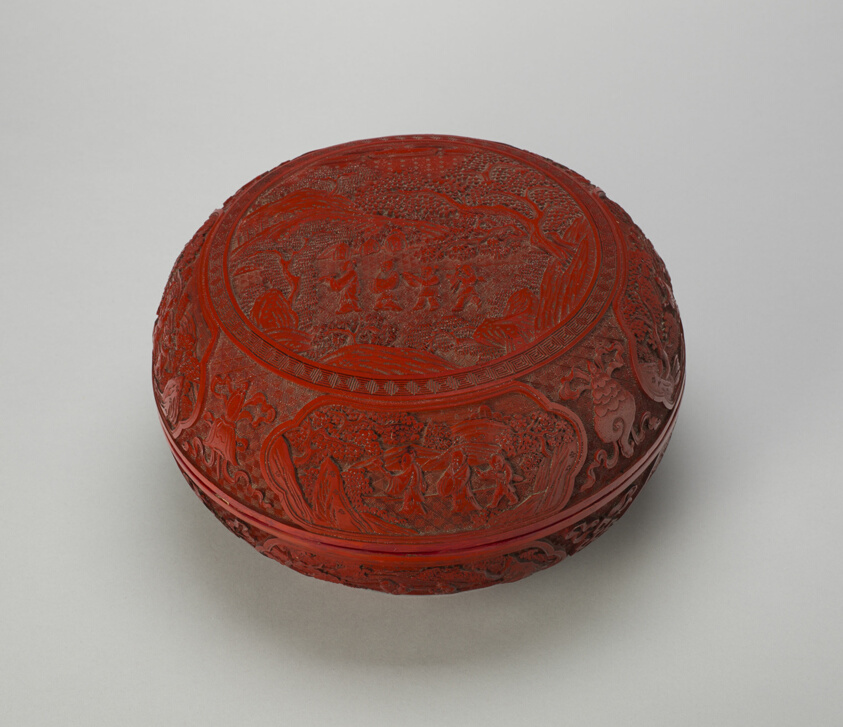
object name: Vessel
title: Cinnabar Lacquer 'Scholar in Landscape' Box and Cover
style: Chinese (culture or style)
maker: China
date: Qing dynasty (1644–1911), Qianlong reign mark and period (1736–1795)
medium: Carved cinnabar lacquer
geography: China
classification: lacquer; asian art; vessel